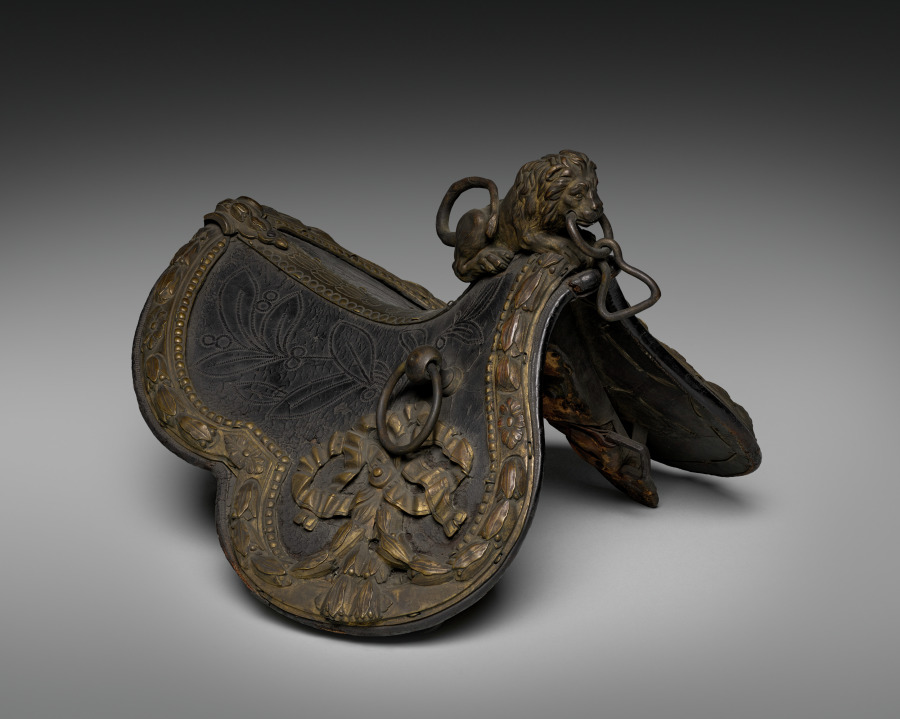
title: Child's Harness Saddle with Lion Pommel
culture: France, 17th century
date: 1600s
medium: leather, tooled with wood, canvas and steel on a brass frame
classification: Arms and Armor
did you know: This child-sized harness saddle was said to have been used in a riding school.